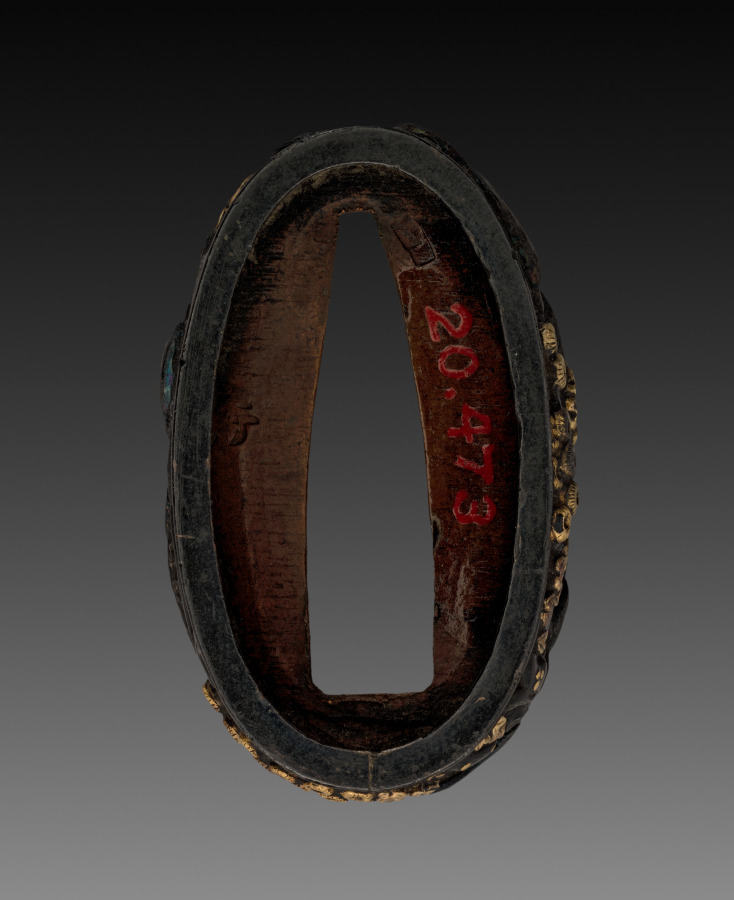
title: Sword-Hilt Collar (Fuchi)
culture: Japan, Edo period (1615–1868)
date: 1700–1850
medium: shakudo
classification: Arms and Armor